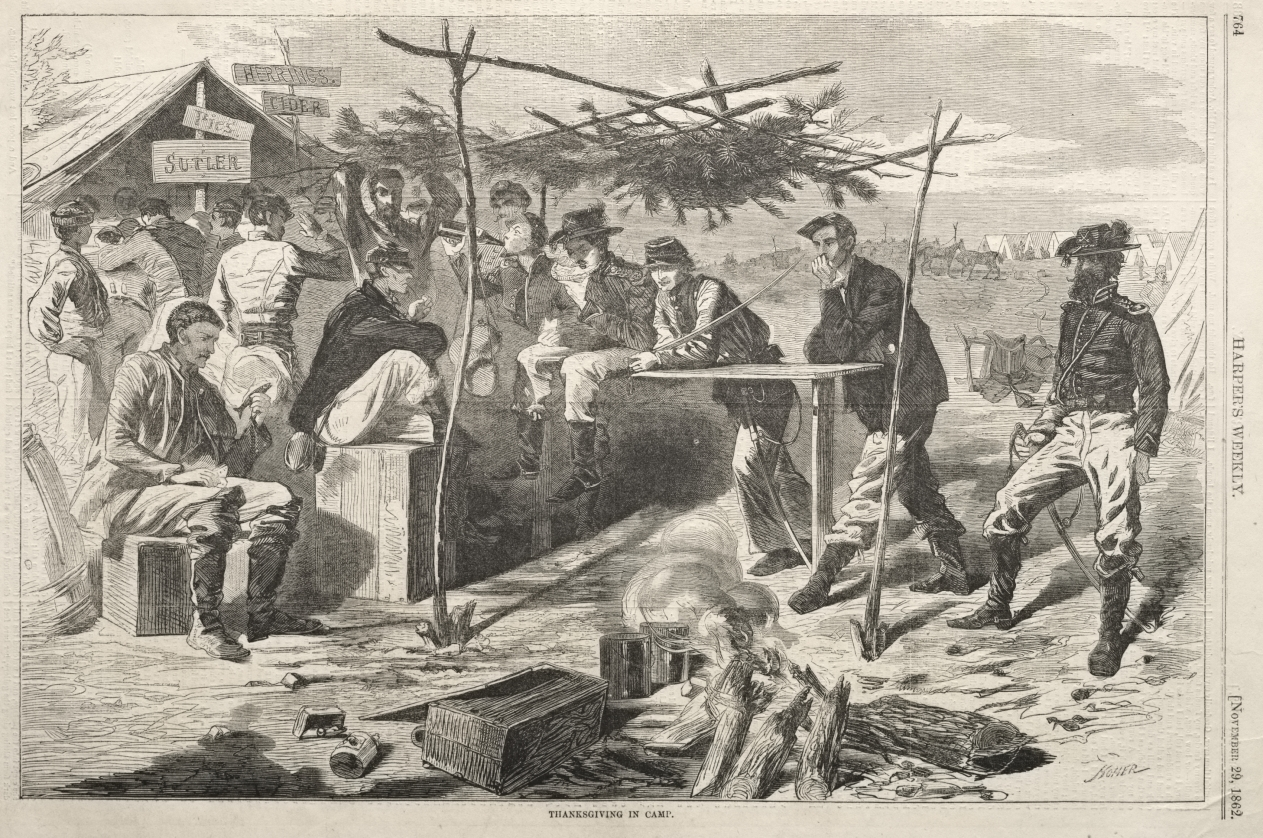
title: Thanksgiving in Camp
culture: America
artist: Winslow Homer (American, 1836–1910)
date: 1862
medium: wood engraving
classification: Print